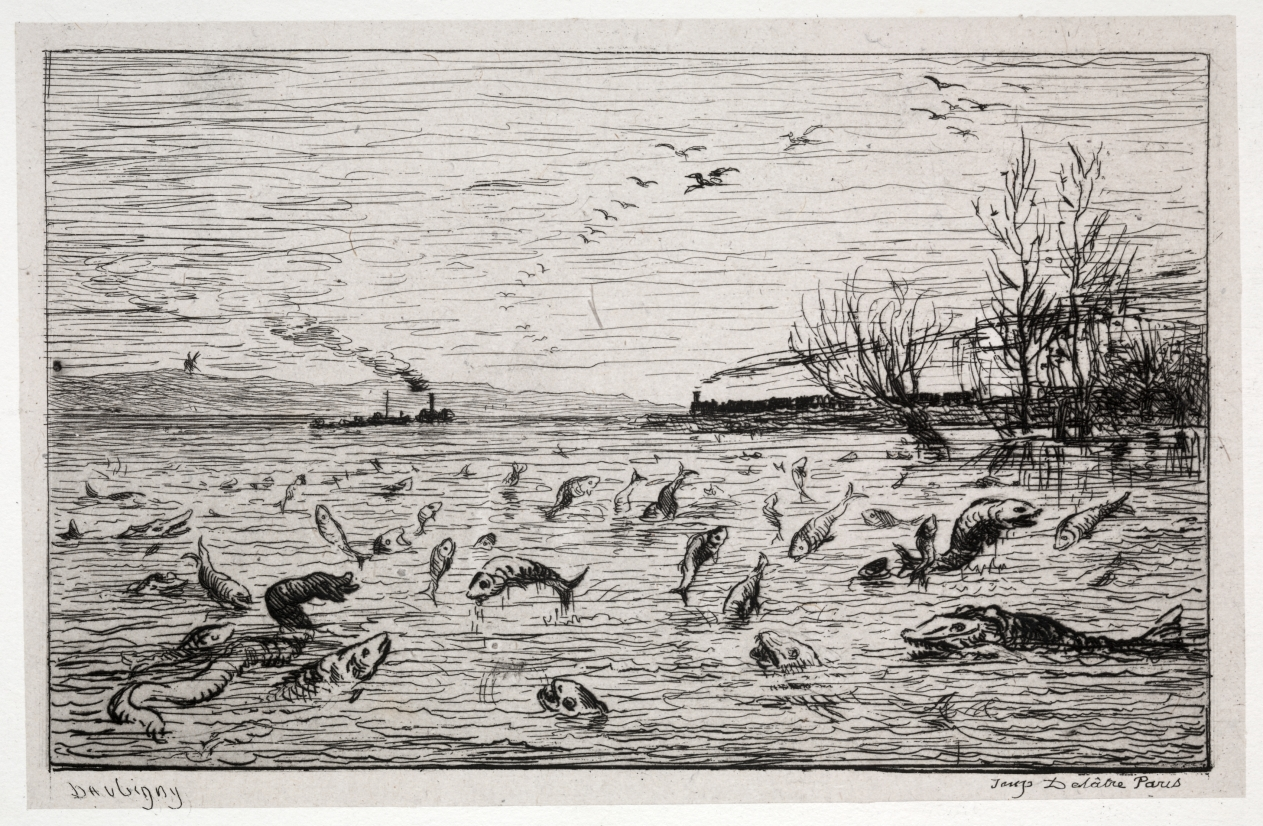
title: The Boat Trip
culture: France, 19th century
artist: Charles François Daubigny (French, 1817–1878)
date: 1861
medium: 16 etchings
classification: Portfolio